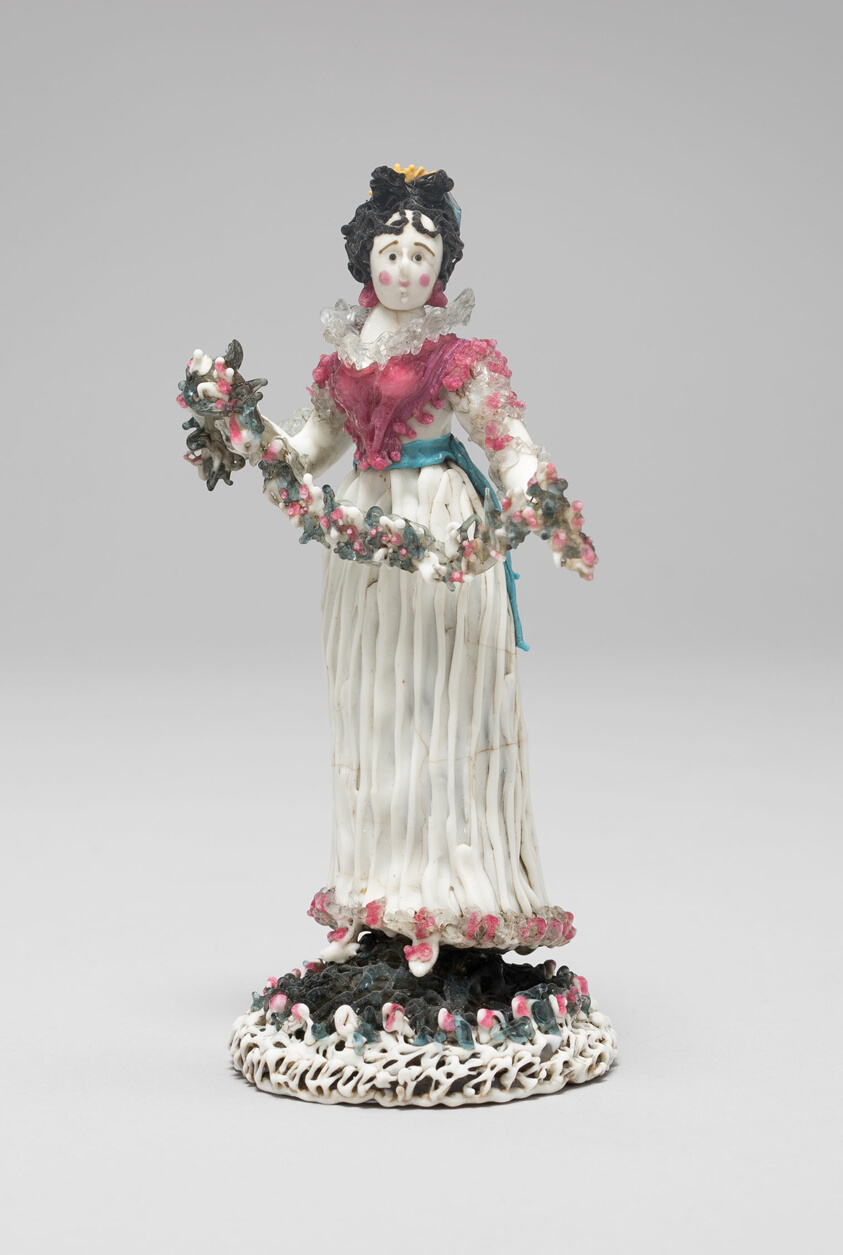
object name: Glass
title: Woman with a Garland of Flowers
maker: Nevers, France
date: 1750/99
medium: Glass; lampwork (verre de Nevers), metal armature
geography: France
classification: decorative object/ornament; lampwork; glass; european decorative arts